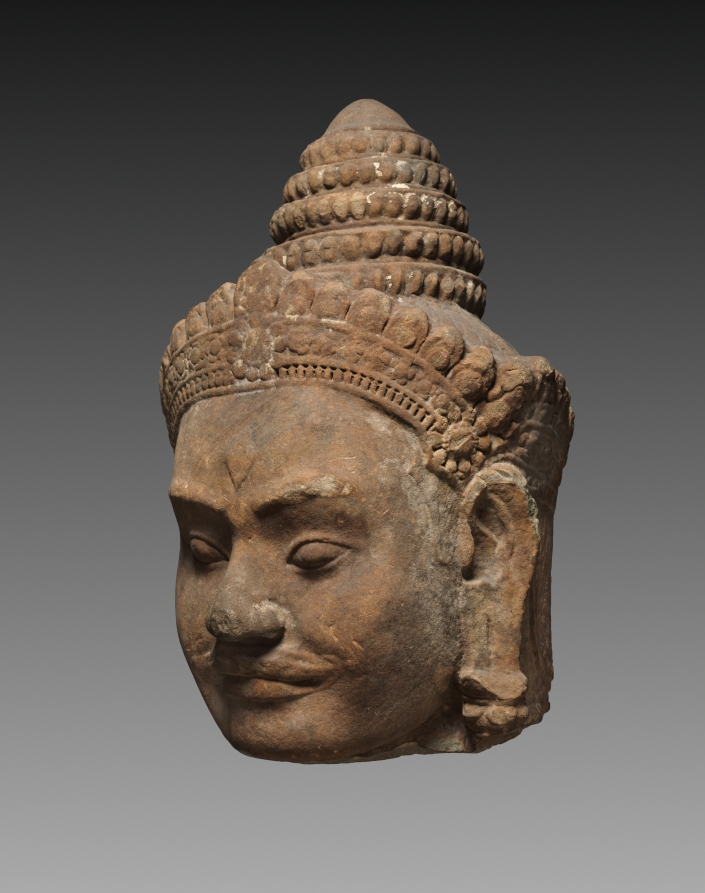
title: Colossal Head of a Deva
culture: Cambodia, Angkor, Preah Khan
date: c. 1200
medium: sandstone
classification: Stone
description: This head is from one of the gods (devas in Sanskrit) who, according to Hindu myth, churned the primordial Ocean of Milk to extract the nectar of immortality. Using a mountain as a churning rod and a serpent as the rope, the gods on one side and the demons on the other vied to win the nectar. The gods prevailed and achieved immortality.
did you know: The deity’s conical tiara consists of a diadem with floral decoration and is topped by a five-tiered lotus narrowing upward.